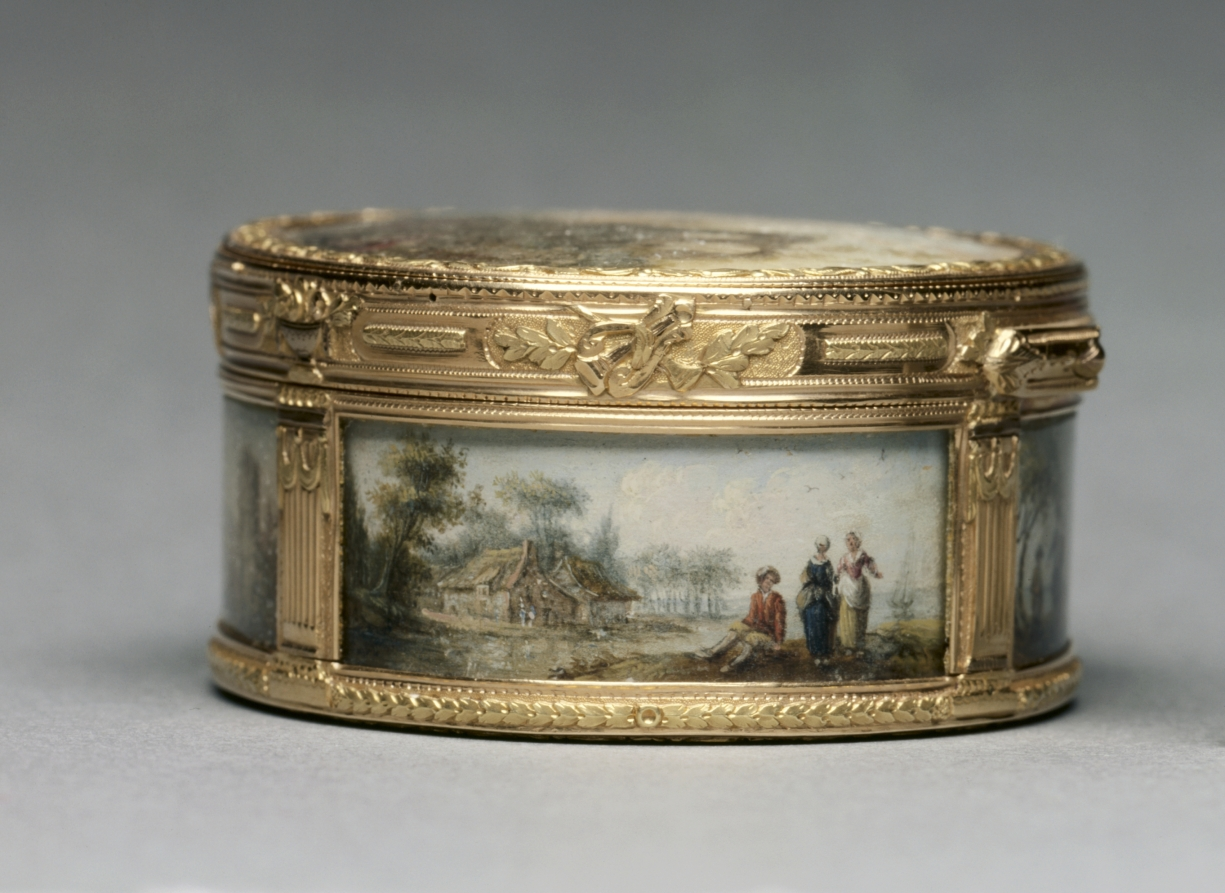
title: Snuff Box (Tabatière)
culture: France, 18th century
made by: Pierre-Nicholas Pleyard (French)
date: 1768–69; 1776–78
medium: gouache miniatures mounted on gold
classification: Metalwork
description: Snuff boxes were highly ornamented functional objects popular among French social elites. They were simultaneously containers for powdered tobacco and a means to communicate social and political status. Often decorated with miniature paintings inspired by popular paintings of the time, the works reproduced on this box are modeled after those of Claude-Joseph Vernet (cover and front panel) and David Teniers the Younger (base, side, and back panels).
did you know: These miniature paintings are mounted à cage, a practice popular in the mid-1700s that involved setting decorated panels into gold frames to create a box’s walls.